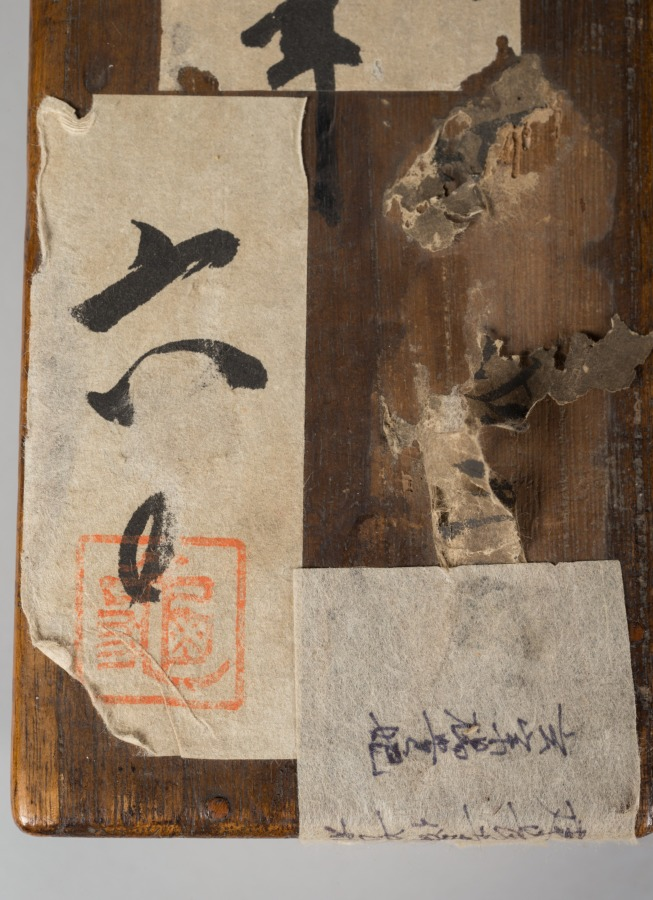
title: Emperor Minghuang Teaching Yang Gueifei to Play the Flute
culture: Japan, Muromachi period (1392–1573)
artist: Choryusai (Japanese)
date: late 1400s–early 1500s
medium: hanging scroll; ink and color on paper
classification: Painting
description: Minghuang, a prominent emperor of Tang (618-906) China and his consort, Yang Gueifei, have inspired many legends, paintings, and poetry in later Chinese culture. Through the study of Chinese literature and the collecting of Chinese paintings, tales of their lives and romance became well-known in Muromachi Japan.